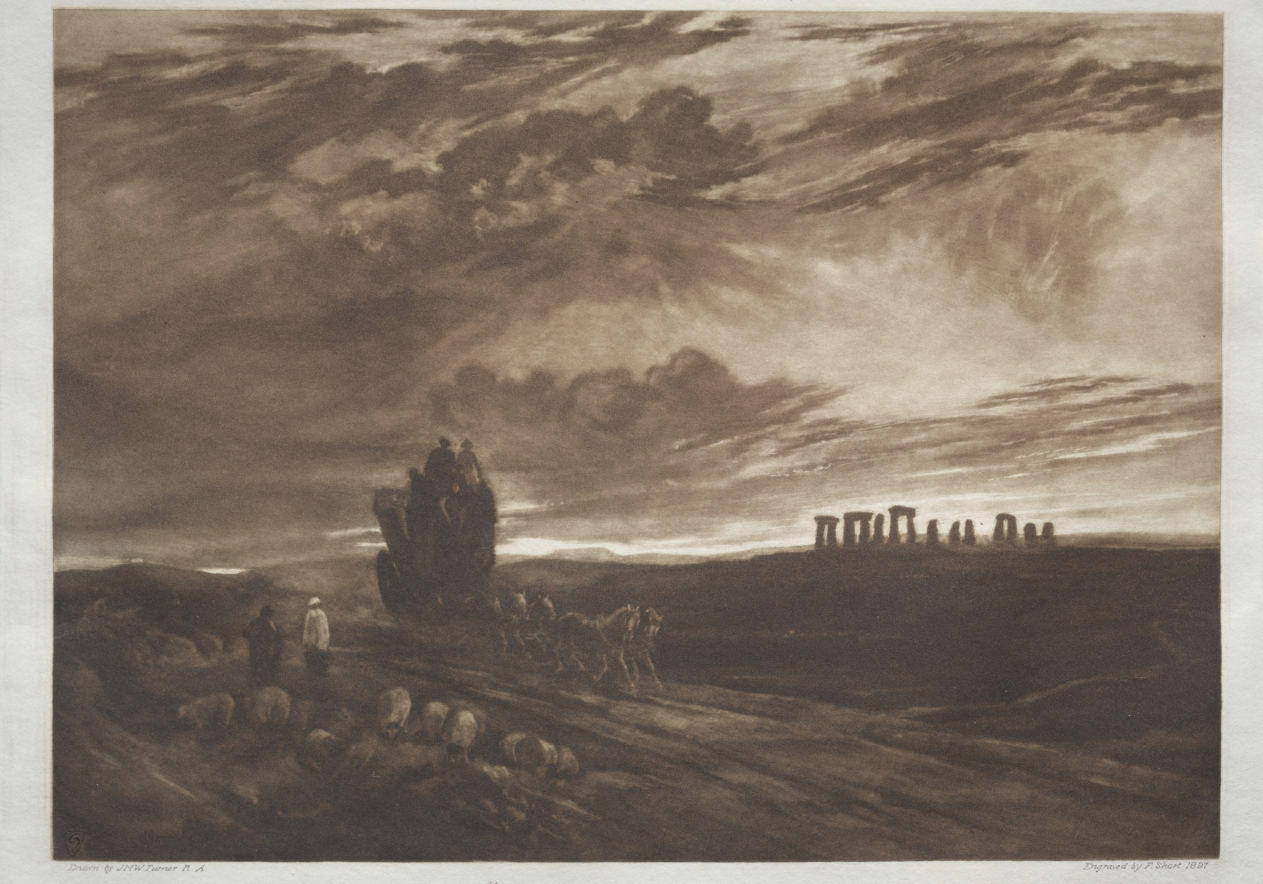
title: Stonehenge at Daybreak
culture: England, late 19th Century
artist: Frank Short (British, 1857–1945)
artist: after Joseph Mallord William Turner (British, 1775–1851)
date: 1897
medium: mezzotint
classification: Print